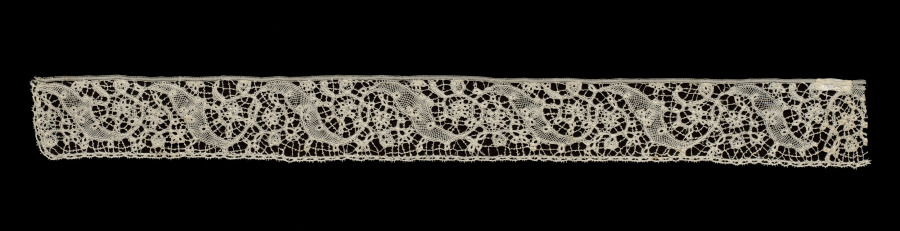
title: Lace Edging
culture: Flanders or Italy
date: 1700s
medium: Bobbin lace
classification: Lace